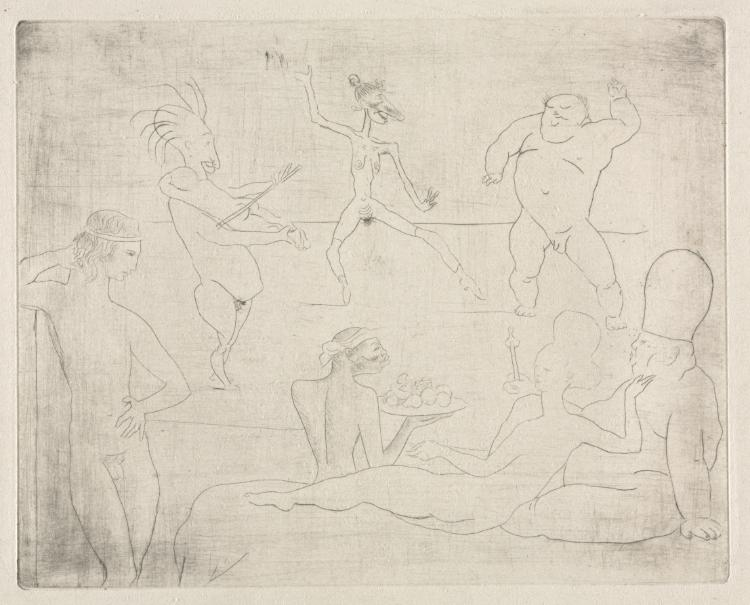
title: The Barbaric Dance (Before Salomé and Herod)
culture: Spain, 20th century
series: The Saltimbanques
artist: Pablo Picasso (Spanish, 1881–1973)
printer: Louis Fort (French, active 1800s–1900s)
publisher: Ambroise Vollard (French, 1867–1939)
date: 1905, printed 1913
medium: drypoint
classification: Print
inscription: Watermark: [VAN GELD]ER ZONEN